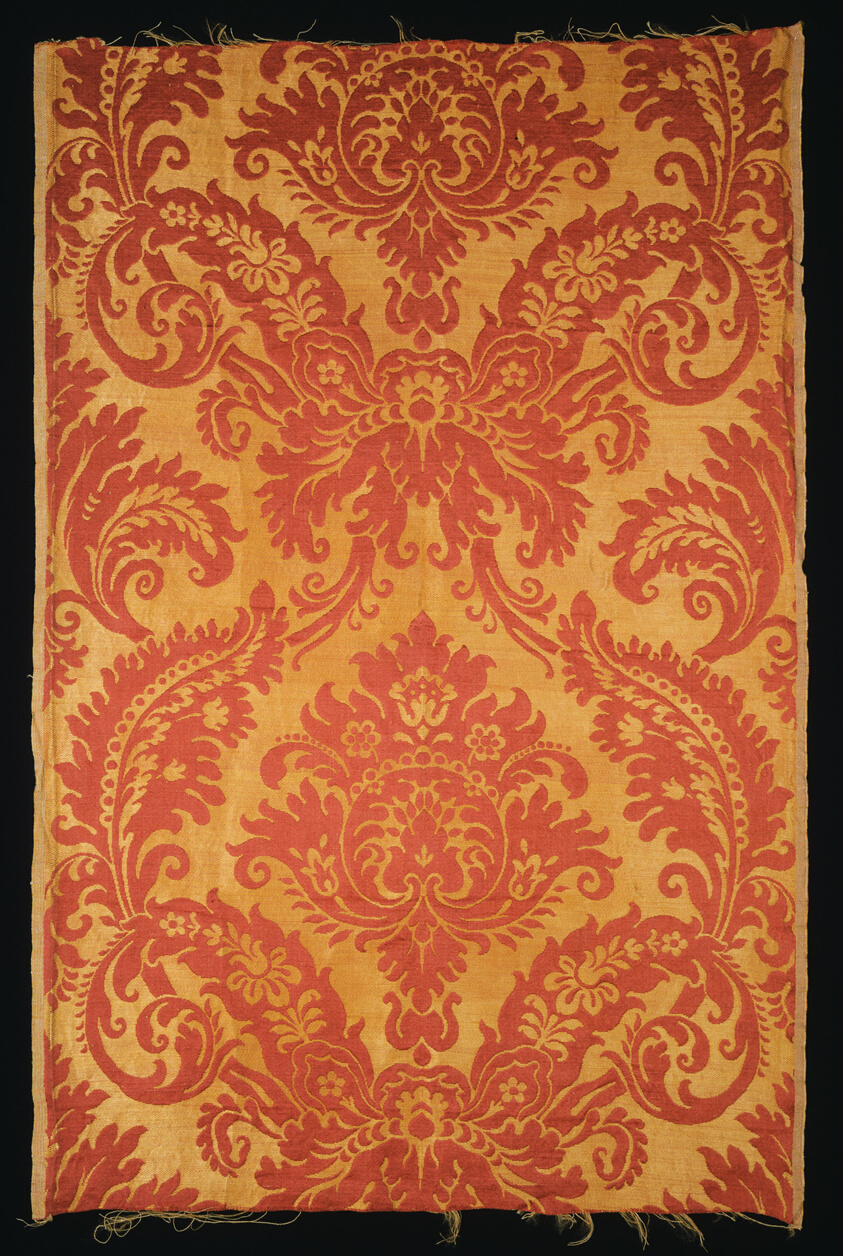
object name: Textile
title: Panel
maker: Spain or Italy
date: 1501/50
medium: Linen and silk, satin damask weave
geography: Spain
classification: textile; weaving